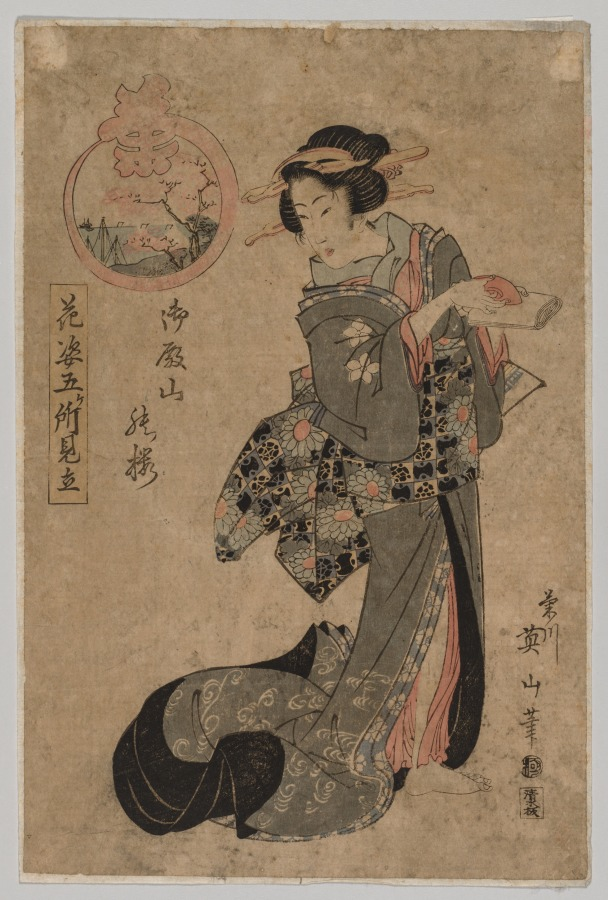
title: Courtesan with Sake Cup and Scroll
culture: Japan, Edo period (1615–1868)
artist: Kikukawa Eizan (Japanese, 1787–1867)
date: 1787–1867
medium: color woodblock print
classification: Print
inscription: Signature: Kikugawa Yeizan fude